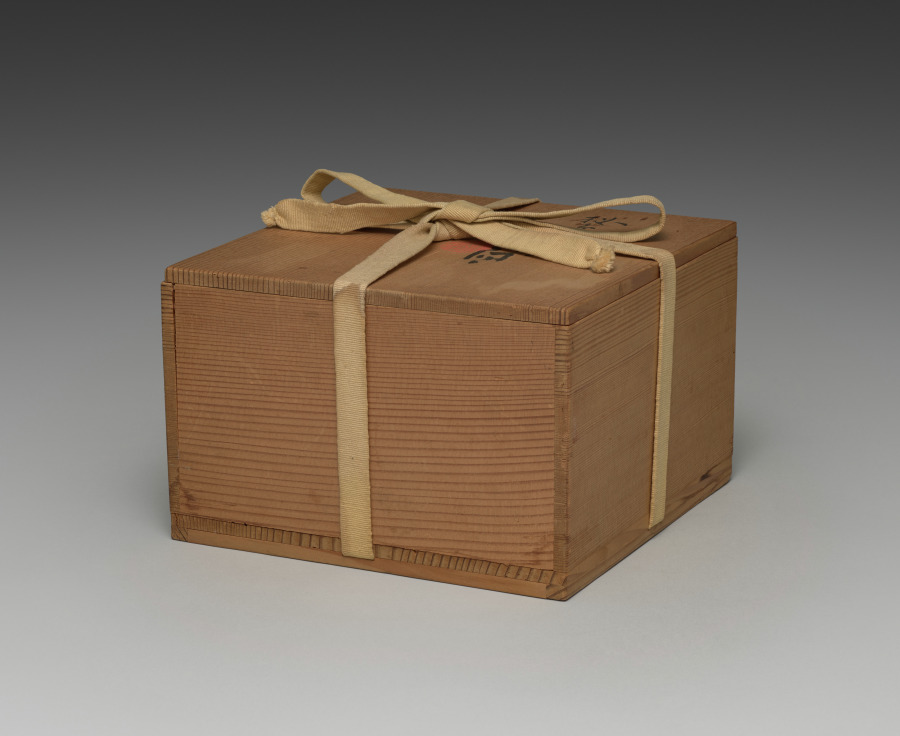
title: Dining Bowl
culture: Japan, Meiji period (1868–1912)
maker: Seifū Yohei III (Japanese, 1851–1914)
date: 1912–14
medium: Porcelain with green glaze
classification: Ceramic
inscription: 共箱の箱書：（蓋表）秘色彩古磁盂（印：清風）；（蓋裏）清風制之（印：帝室技藝員）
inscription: 彫銘：清風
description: This Yohei III dining bowl with an everted rim has a glaze identified in its box lid inscription as hisoku (C. mise), or “mysterious color.” This name typically refers specifically to a type of high-quality, green-glazed ceramic produced in the ninth and tenth centuries at the Yue kilns in China’s Zhejiang Province as tribute ware for the imperial family.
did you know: Many ceramics created by the Seifū Studio refer to and emulate Chinese ceramics in form and glazing.